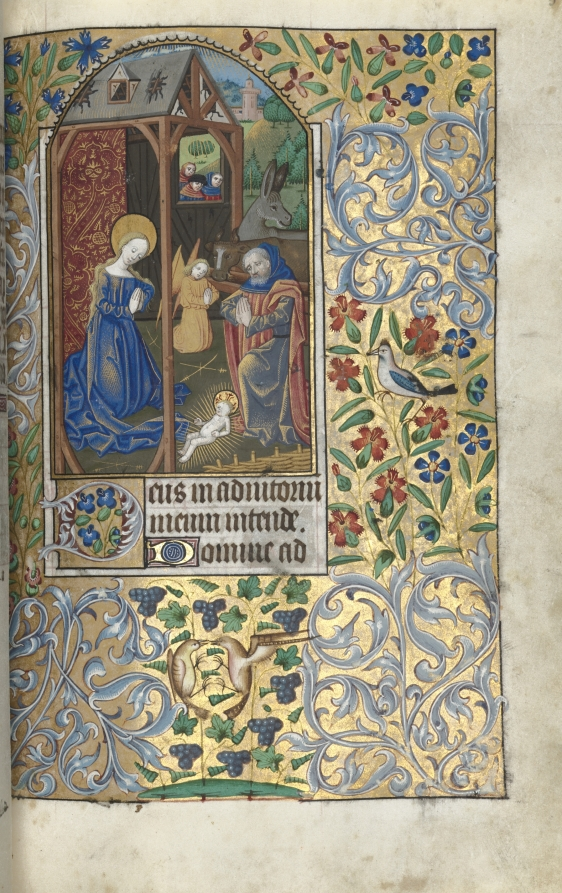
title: Book of Hours (Use of Rouen): fol. 56r, Adoration with Shepherds/Nativity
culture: France, Rouen, 15th century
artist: Master of the Geneva Latini (French, active Rouen, 1460–80)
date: c. 1470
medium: ink, tempera, and gold on vellum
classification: Bound Volume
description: In the late 1400s and early 1500s Rouen was an established and important center of book production. The city’s cathedral had a wealthy chapter that spent large sums of money to commission books and to maintain its extensive library. The stationers and booksellers would have likely been concentrated in or near the cathedral precinct. This artist, named after a manuscript now in Geneva, was Rouen’s principal illuminator during the second half of the 1400s.